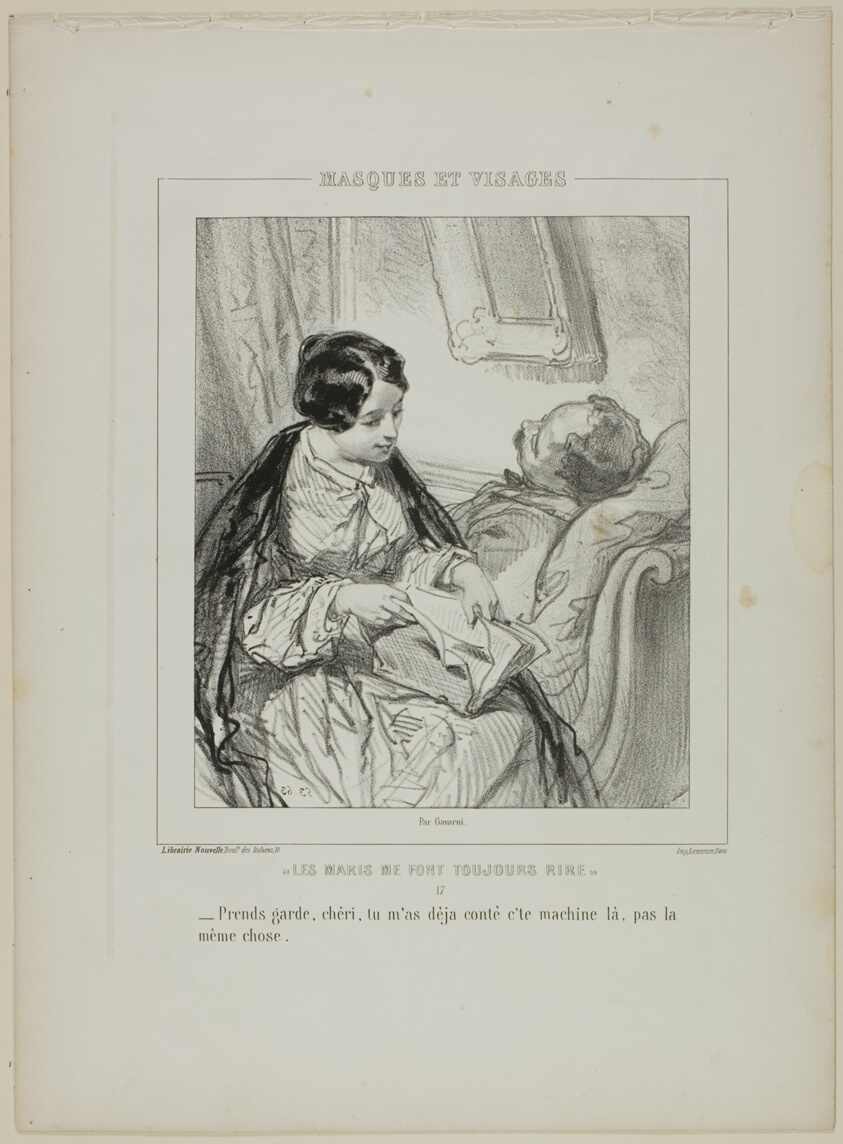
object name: Print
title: Les maris me font toujours rire: Prends garde, chéri..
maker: Paul Gavarni (French, 1804-1866)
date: 1853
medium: Lithograph in black on cream wove paper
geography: France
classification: lithograph; print; prints and drawing